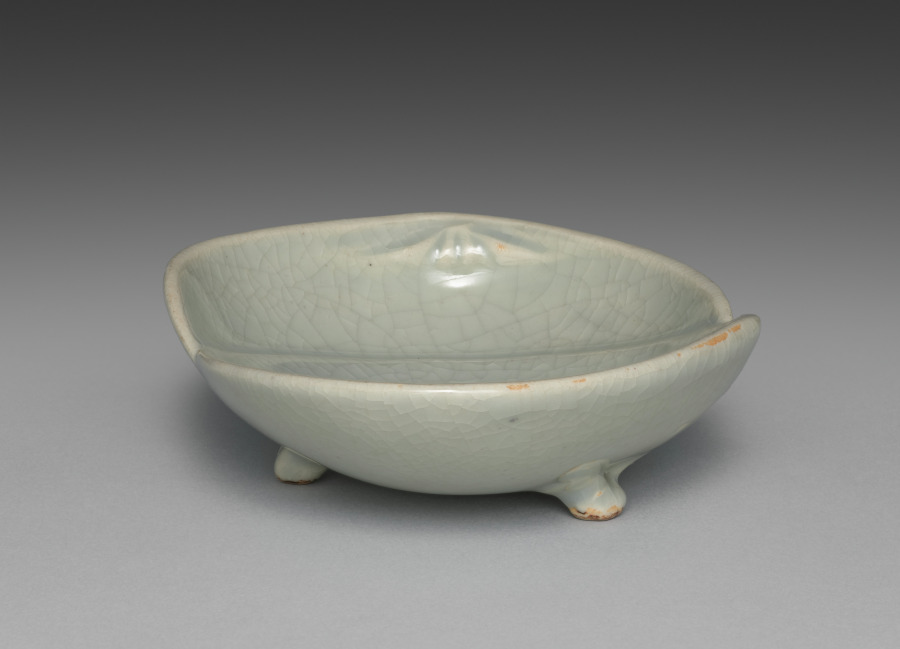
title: Dish from Dishes with Matching Shells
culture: Japan, Meiji period (1868–1912)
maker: Seifū Yohei III (Japanese, 1851–1914)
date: 1893–1914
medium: One of a pair of dishes; porcelain with celadon glaze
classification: Ceramic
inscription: 清風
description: Yohei III’s main output for his sophisticated clientele was in the form of tea sets and dining sets. He created a range of dishes in green glazes. He often produced in pairs, sets of five, or sets of ten. This pair of shell dishes have a box lid interior attestation by Yohei IV that the dishes were made by Yohei III with a cracked-ice (hyōretsu) pattern in the glaze, omitting reference to any glaze coloration.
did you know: These shell-shaped dishes are of the saucer type, suitable for dipping sauces.